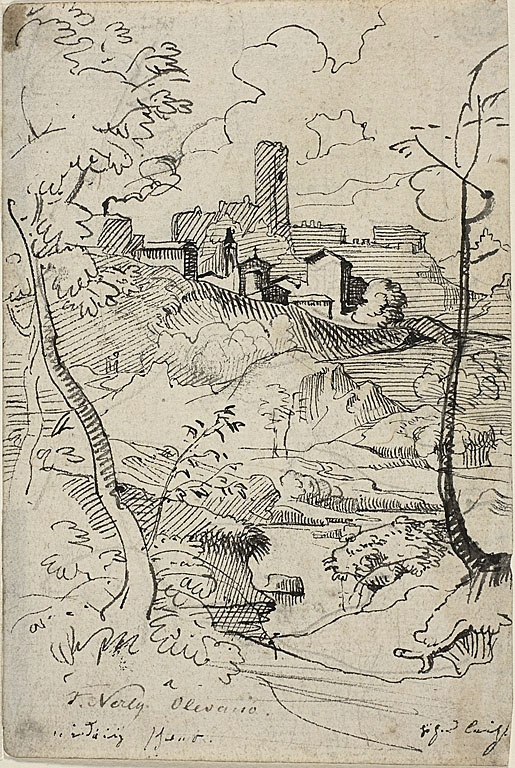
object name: Drawing and Watercolor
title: Italian Town with River (recto); View of a Town (verso)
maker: Attributed to Friedrich Nerly (German, 1807-1878); or François Verly (French, 1760-1822)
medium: Pen and black ink, over graphite, on cream laid paper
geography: France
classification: pen and ink drawings; drawings (visual works); prints and drawing